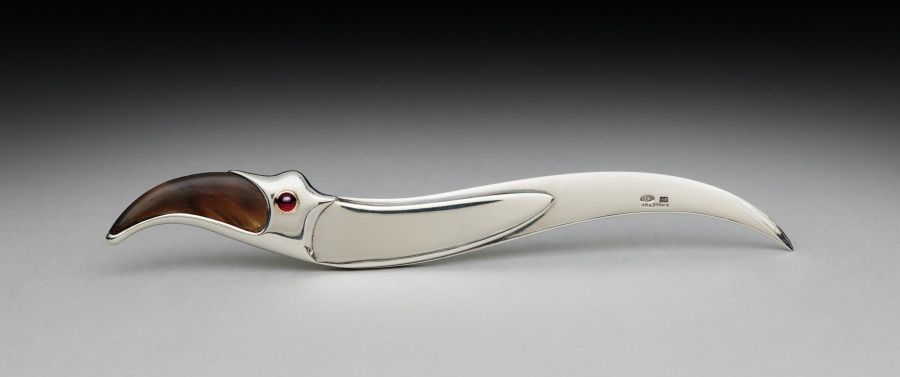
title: Letter Opener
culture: Russian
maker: House of Fabergé (Russian, 1842–1918)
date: c. 1899–1908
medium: Silver, bear claw, garnet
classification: Silver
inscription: “K. Fabergé” in Cyrillic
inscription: Cyrillic initials “AR”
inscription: kokoshnik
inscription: “88” silver standard